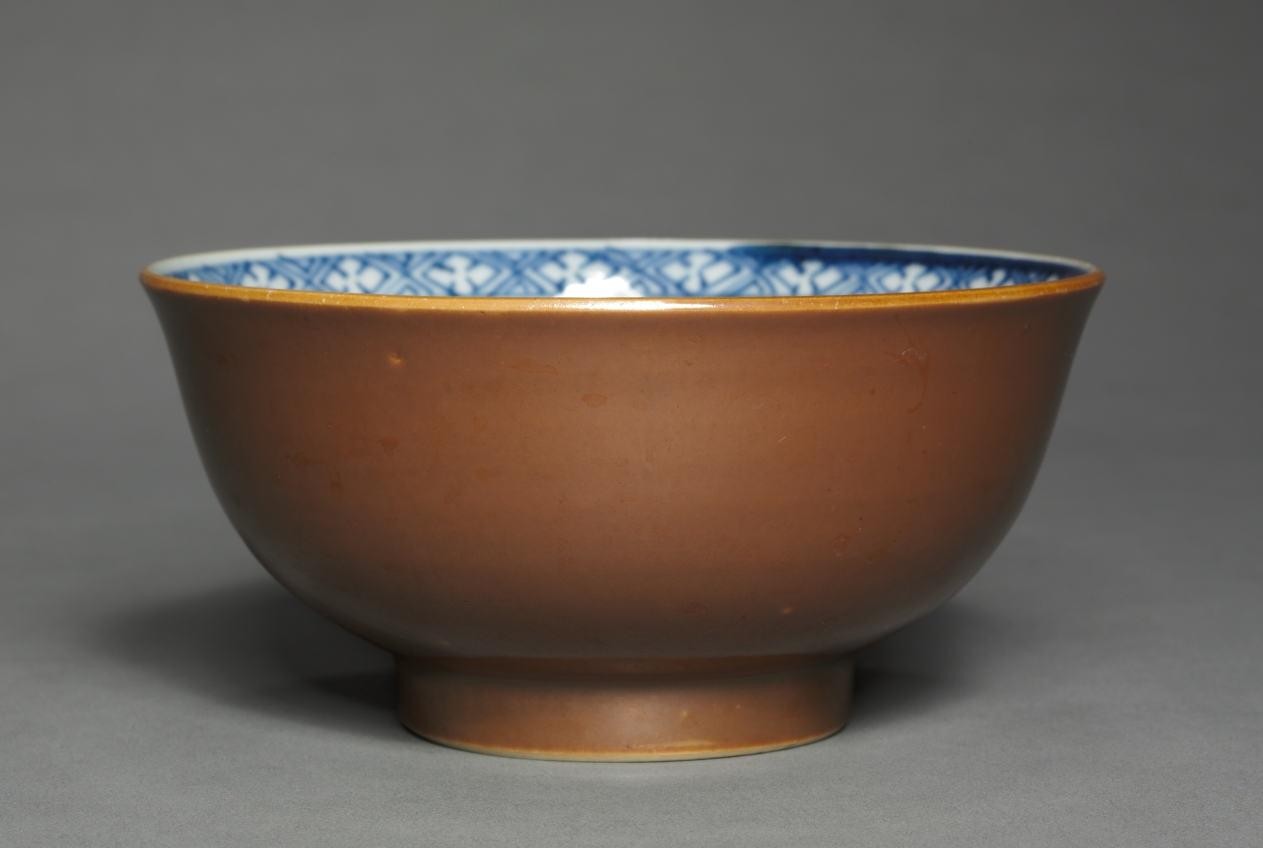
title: Bowl with Floral Sprays and Medallions with Figure in Landscape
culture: China, Jiangxi province, Jingdezhen kilns, Qing dynasty (1644-1911), Yongzheng mark and reign (1723-35)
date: 1723–35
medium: porcelain with underglaze blue decoration (interior) and café-au-lait glaze (exterior)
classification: Ceramic